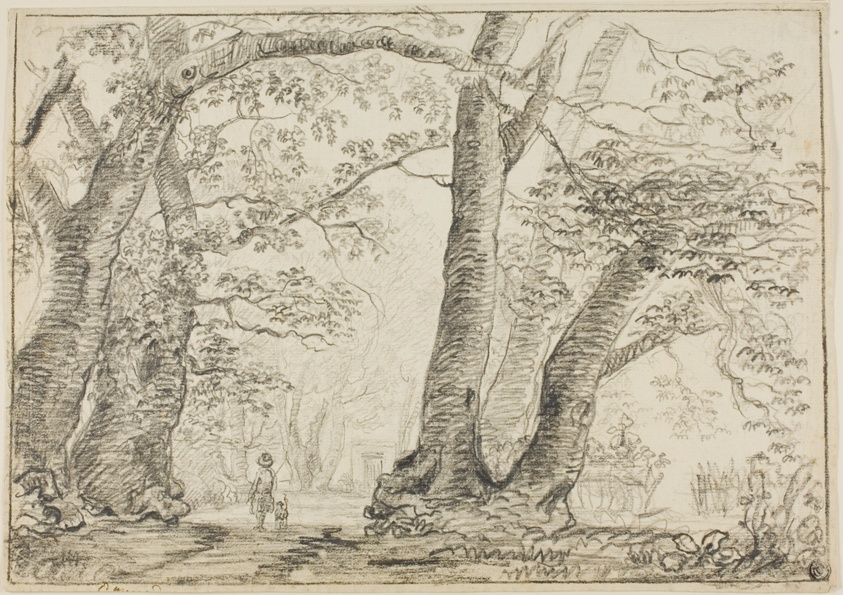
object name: Drawing and Watercolor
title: Man with Dog in Forest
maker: Unknown Artist; probably English, 18th century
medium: Black crayon on ivory laid paper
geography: England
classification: chalk; drawings (visual works); prints and drawing